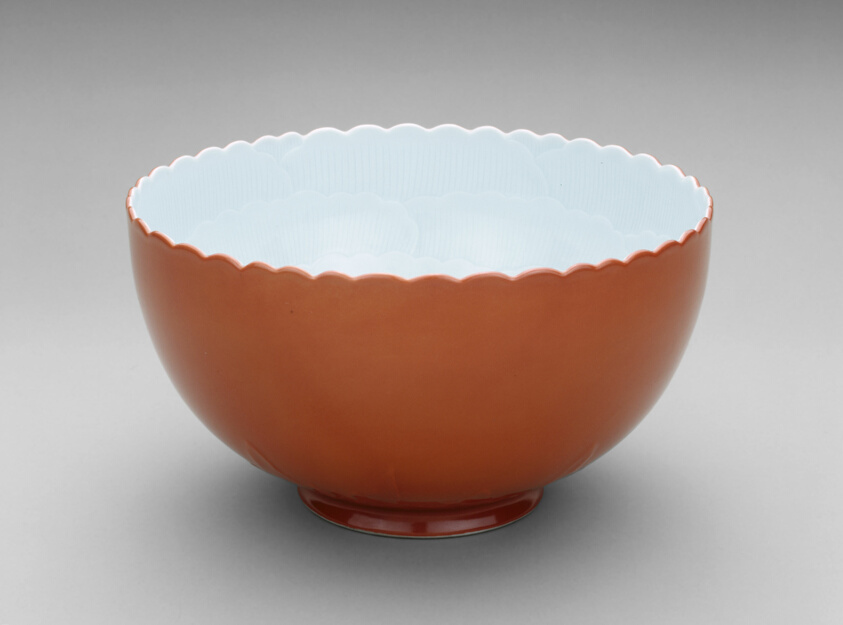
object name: Decorative Arts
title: Lobed Bowl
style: Japanese (culture or style)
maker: Seifu Yohei III (Japanese, 1851-1914)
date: 1890/1900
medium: Porcelain with incised floral design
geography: Japan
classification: bowl; dish (vessel); asian art; ceramics; decorative arts